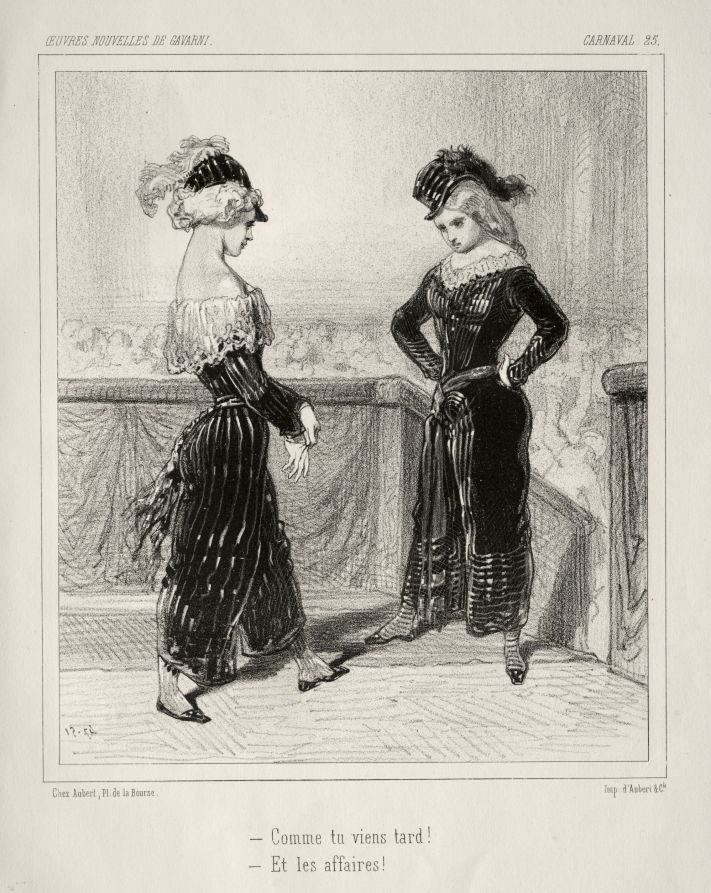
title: Carnaval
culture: France, 19th century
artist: Paul Gavarni (French, 1804–1866)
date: c. 1841–47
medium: lithograph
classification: Print